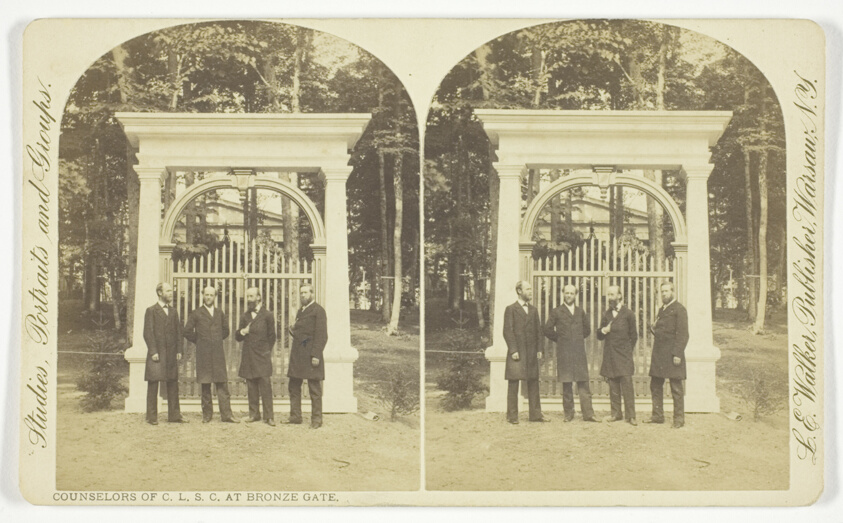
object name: Photograph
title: Counselors of C.L.S.C. at Bronze Gate, from the series "Studies, Portraits and Groups"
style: 19th century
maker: L.E. Walker (American, died 1881)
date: 1850/81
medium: Albumen print, stereo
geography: New York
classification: photography; photograph; albumen silver print; stereograph (albumen)